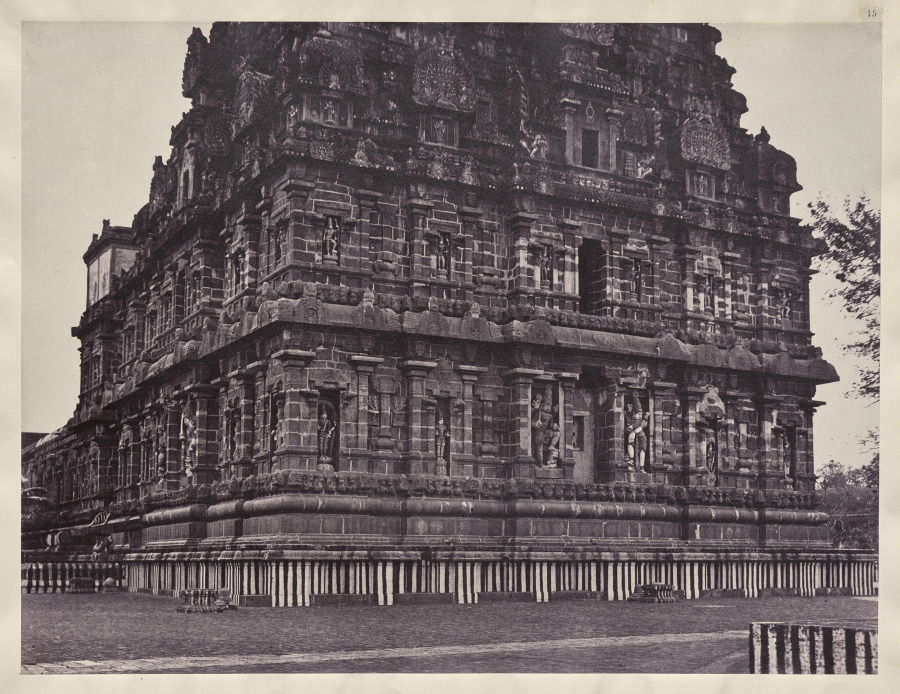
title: West and South Sides of the Vimana Walls, Great Temple (Brihadeshvara) at Tanjore (Thanjavur)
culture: England, 19th century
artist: Captain Linnaeus Tripe (British, 1822–1902)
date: 1858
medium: albumenized salt print from a waxed paper negative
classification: Photograph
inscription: Imprinted in black type on white paper adhered to recto of mount: "15"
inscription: Embossed on recto of mount: "LT/Photographer to Government"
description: The double-storied exterior base of one of the largest temples constructed and still standing on the Indian subcontinent is articulated with niches containing images of Hindu gods. Within these walls is an inner sanctum containing a monolithic linga (the phallic emblem marking the sacred presence of the god Shiva). Tripe used waxed paper instead of glass negatives, possibly because he was concerned about breakage and weight. When printing the photograph, he laid the negative on a paper treated with a light-sensitive emulsion of sodium chloride (table salt) and silver nitrate and exposed it to light, to create a “salt print.”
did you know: This is thought to have been the tallest structure in the world when it was constructed around 1000.